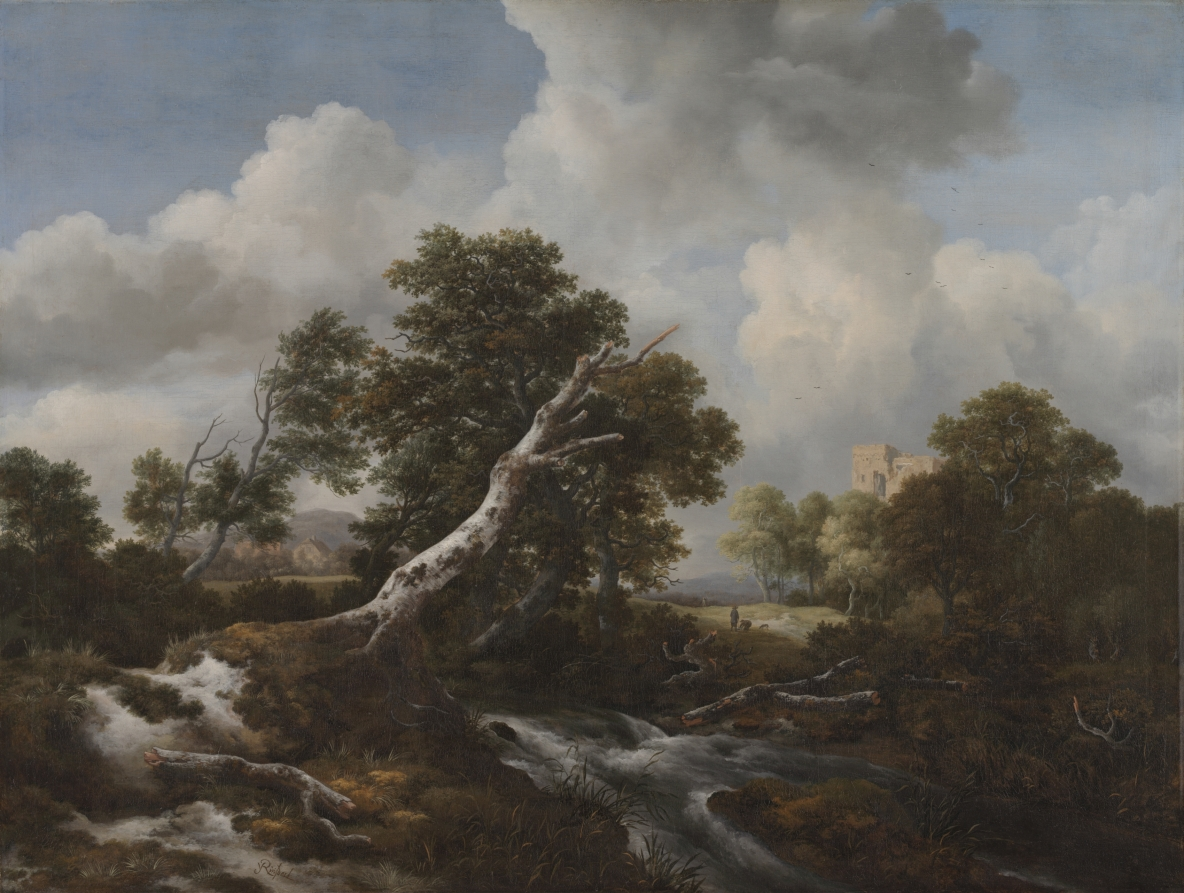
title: Low Waterfall in a Wooded Landscape with a Dead Beech Tree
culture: Netherlands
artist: Jacob van Ruisdael (Dutch, 1628/29–1682)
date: c. 1660–70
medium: oil on canvas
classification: Painting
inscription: Signed lower left: "JvRuisdael {JvR in monogram]"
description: Jutting from a dune in the foreground, the massive silvery trunk of a dead tree leads the eye across a waterfall and toward a distant sunlit field where travelers and a dog traverse a sandy path. Partly masked by trees, a ruined building is turned gold by the sun. In Jacob van Ruisdael’s landscapes, dead trees, waterfalls, and ruined buildings were visual expressions of the passage of time. Ruisdael devoted equal attention to the cloud-filled skies looming above the land, creating dramatic patterns of light and shadow and revealing the unseen movements of the wind.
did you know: Jacob van Ruisdael was inspired by trees in various states of decay, observed from nature.